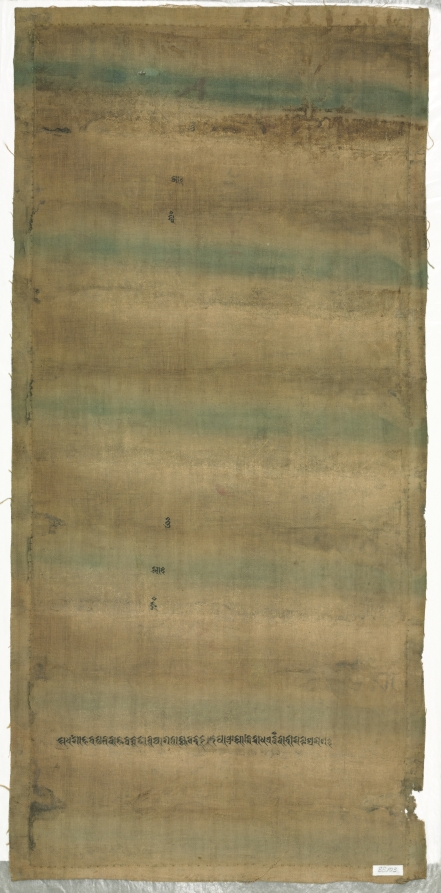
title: Lohans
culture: Sino-Tibetan, Yuan dynasty (1271-1368)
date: c. 1300–1350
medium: color and gold on cotton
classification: Painting